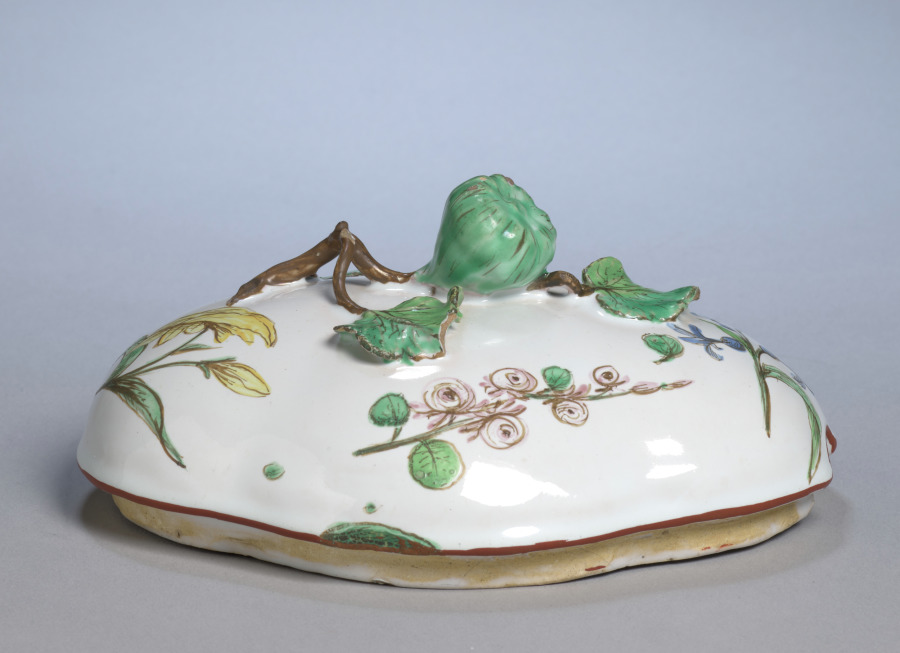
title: Sugar Basin (lid)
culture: France, 18th century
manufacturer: Sceaux Factory (French, active 1748–66)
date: c. 1750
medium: faience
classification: Ceramic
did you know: In medieval Italian churches, painted altarpieces served as a focal point for worshippers during the rituals of faith. The figures of Jesus, Mary, and eight saints are framed by a golden background that would have glistened in the flickering candlelight of the church.